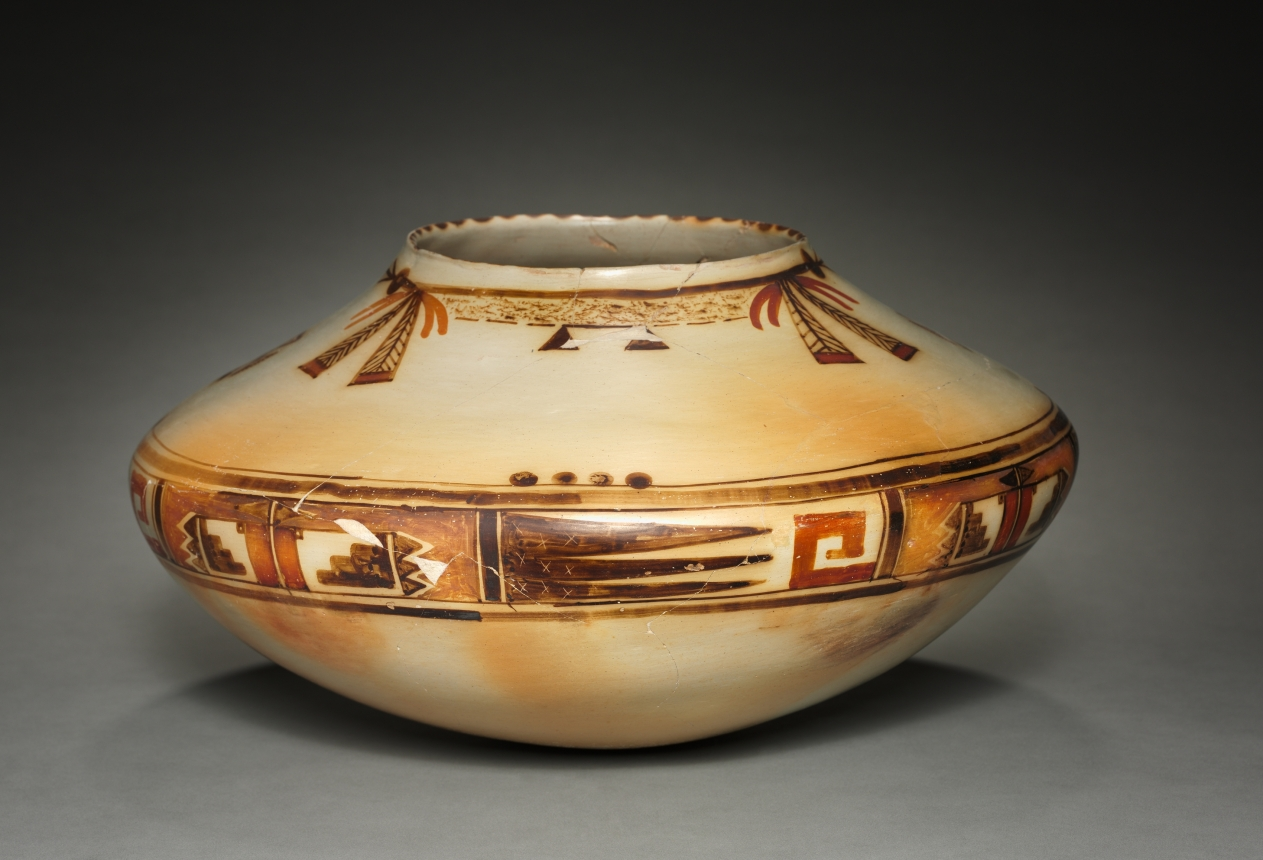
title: Jar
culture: Native North America, Southwest, Ancestral Pueblo, Sikyatki style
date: 1400–1600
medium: Ceramic, slip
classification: Ceramic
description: Ancient Sikyatki ceramics are noted for their large, distinctive shapes, meticulously stone-polished surfaces, thin walls that “ring” when tapped, and wide variety of reds and oranges, a contrast to earlier preferences for black and white. These artistically and technically inventive vessels are ancestral to modern Hopi ceramics, having developed in the area where Hopi communities live today. The Hopi regard a mottled orange color as a sign that the pot emerged from firing with life and spirit; the vessel’s “voice” is a bell-like tone that tapping produces. Such concepts likely have roots in the ancient past.